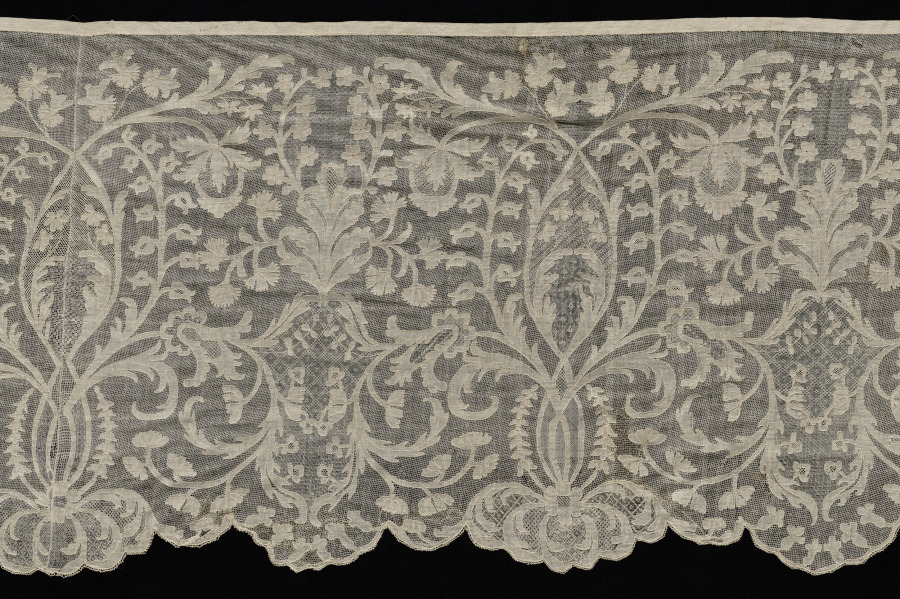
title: Lace Flounce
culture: Unassigned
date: 1700s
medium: Linen: needle lace (drawnwork) and embroidery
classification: Lace